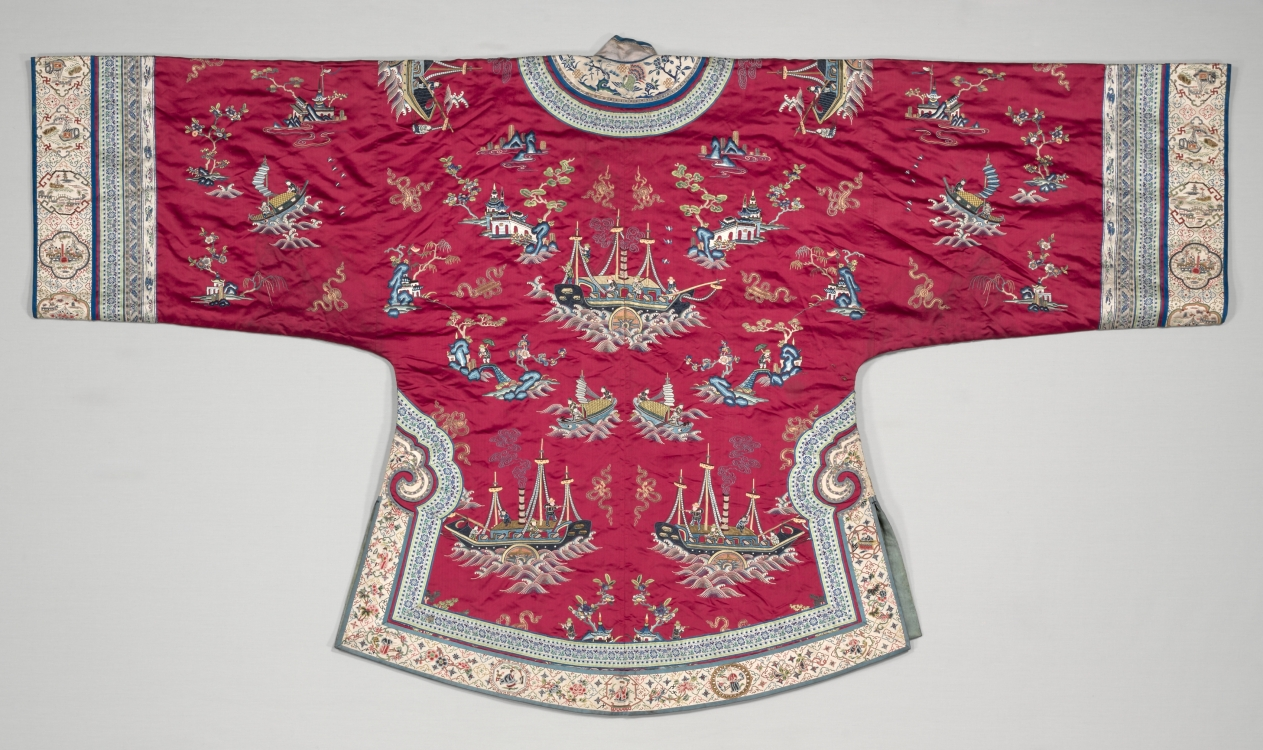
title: Coat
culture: China, Qing dynasty (1644–1911)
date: late 1880s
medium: Silk, gold thread: embroidery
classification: Garment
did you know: This was likely made for a wife of a wealthy merchant, whose business would rely on ships like the embroidered ones on the coat.